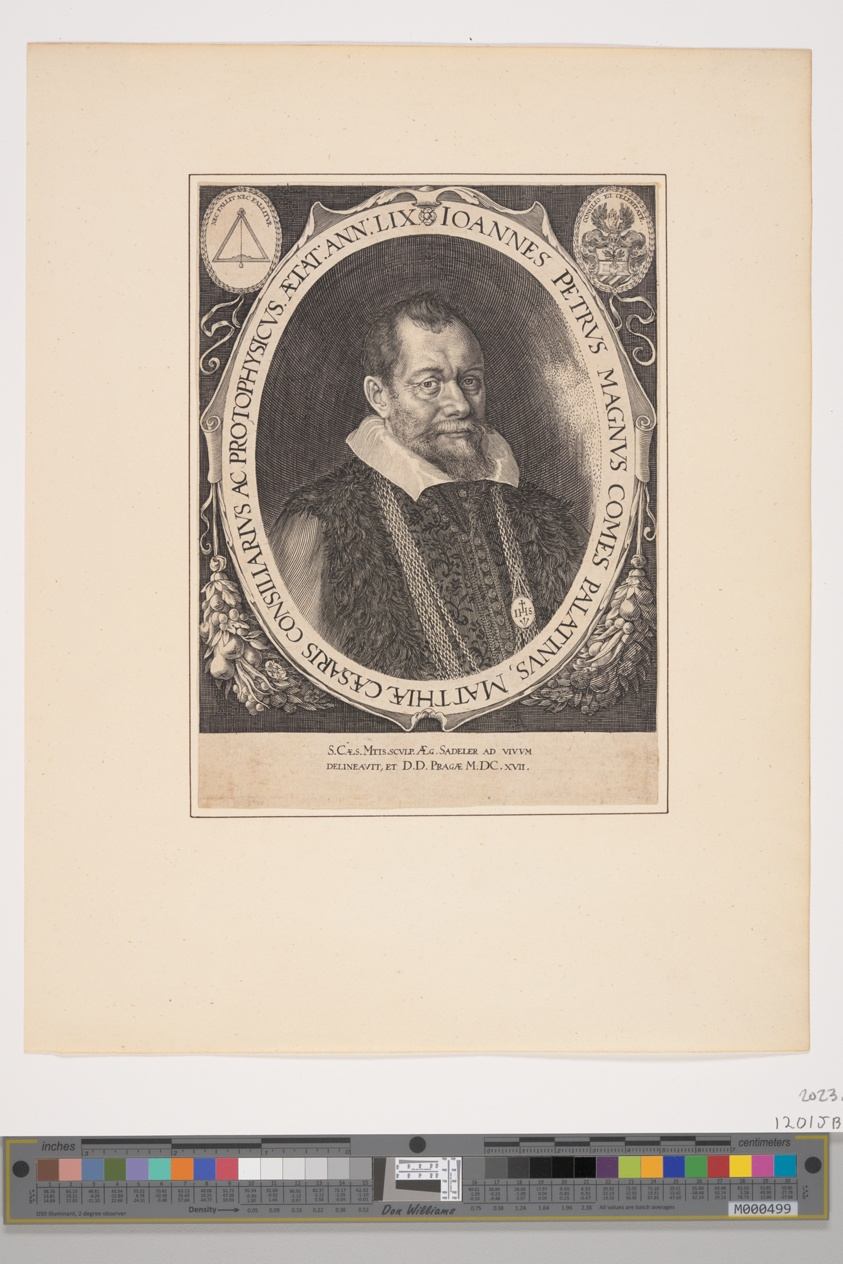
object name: Print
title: Johann Peter Magnus, Physician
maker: Aegidius Sadeler II; Flemish, c. 1570–1629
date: 1617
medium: Engraving on paper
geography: Flanders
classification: engraving; paper; print; prints and drawing